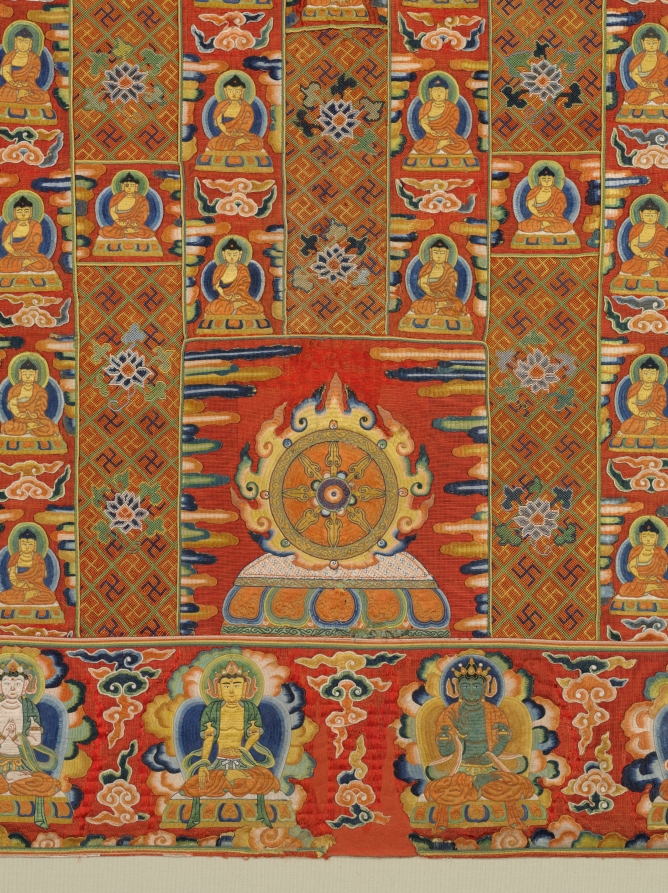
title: Buddhist Priest's Ceremonial Robe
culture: China, Ming dynasty (1368–1644)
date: 1400s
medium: silk and gold thread; embroidery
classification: Garment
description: This example of imperial embroidery is one of the earliest surviving Chinese Buddhist robes (kasaya) in the West. Depicting 991 Buddhas, each slightly different, it is constructed out of patches in reference to the legend in which the Buddha's favorite disciple divided a robe he was given into 30 pieces. Patchwork is also a sign of humility. Multiple Buddha images known as “thousand Buddha” designs are seen painted and sculpted on the walls of cave temples in India, Afghanistan, Central Asia, and China, but are rare on garments. The Four Heavenly Kings, guardians of the four directions, occupy the textile’s corners. When draped around the body, the inverted figures in the upper left corner appear right side up. Robes with 25 columns were worn by the highest-ranking clergy on ceremonial occasions.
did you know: The Five Transcendent Buddhas, who symbolize the purity of the five elements, are repeated around the edges.